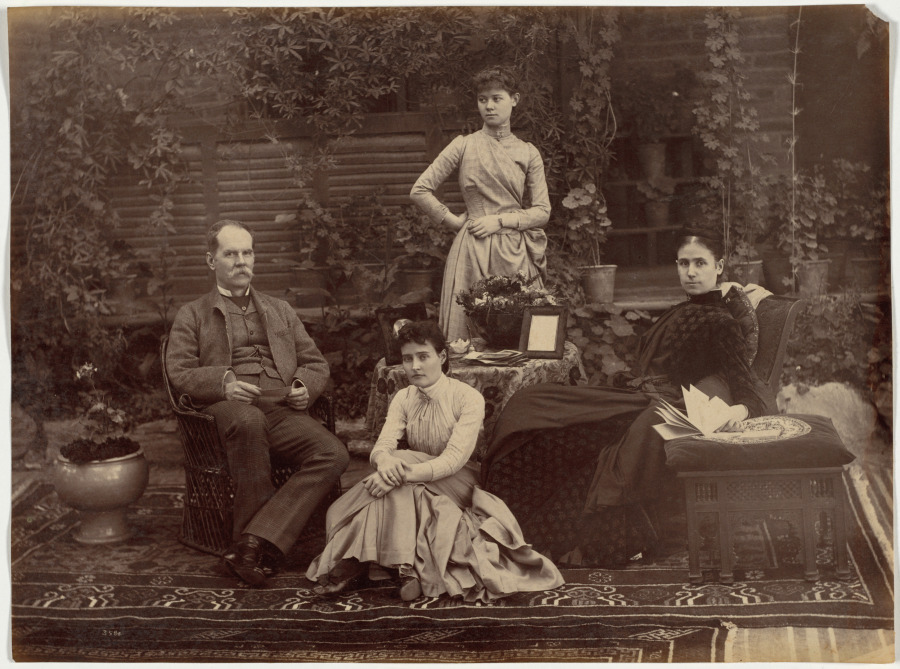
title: Sir Auckland Colvin and Family, Shimla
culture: India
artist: Raja Deen Dayal (Indian, 1844–1905)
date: 1887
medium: albumen print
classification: Photograph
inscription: Written in pencil on verso: “3584”; Imprinted in white in negative: “3584”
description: Deen Dayal’s large glass plate negatives and view camera required daylight to capture people without a blur, so his large group portraits are usually set before the sitters’ homes in their gardens. The equipment also dictated that scenes be carefully posed, not candid, shots. Sir Auckland Colvin (1838–1908) and his daughters were photographed in 1887, the year he became lieutenant governor of North-Western Provinces, a position his father had once held. The sitters are arranged so they orbit two framed photographs displayed on a table, presumably depictions of Colvin’s deceased wife and son. Thanks to photography, the entire Colvin family was reunited.